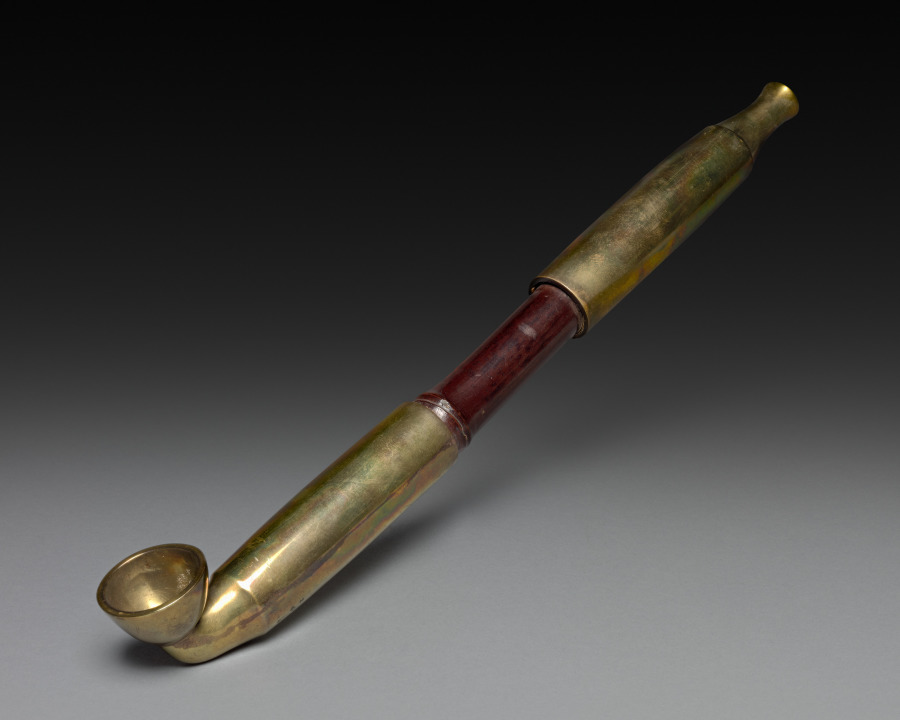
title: Tobacco Pipe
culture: Japan, Edo period (1615–1868)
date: early to mid-1800s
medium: bamboo and brass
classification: Miscellaneous